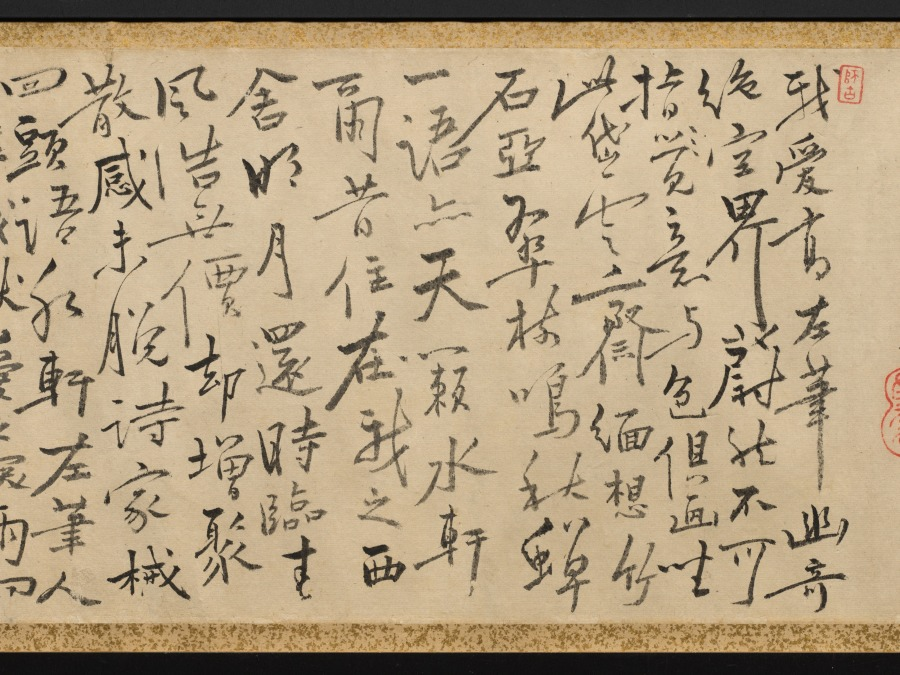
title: Plum Blossoms and Peonies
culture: China, Qing dynasty (1644-1911)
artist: Gao Fenghan (Chinese, 1683–1749)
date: 1741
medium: handscroll, ink on paper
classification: Painting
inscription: Artist's 2 inscriptions and 9 seals (the painting of Peonies with the artist's colophon and the colophon by Hou Chia-fan are on a single sheet of paper). Artist's inscription and 2 seals (Plum Blossoms): [seal] Ts'ai-yün. After finishing writing my colophon, I unrolled the painting to take another look, and it now seems that the composition here should have moved to the later part of the scroll. If that is the case, then the "Cool Beauty" [prunus] of the Solitary Hill is after all unable to take precedence over the "King of Flowers" [peony]. A laugh. Lao-fou inscribed. [seal] Feng-han. Artist's colophon (Plum Blossoms): [3 seals] Tun; Yen-yün-kung-yang, Hou-shang-tso-sheng. A few days after I painted this scroll for Shui- hsien [Yüeh Meng-yüan], the plum blossoms were in full bloom at his residence. He invited me over to enjoy them together for a long while, and I composed two additional poems and wrote them down here for his criticism. [Poems on the colophon are not translated.] First month, twenty-first day, your junior, Kao Feng-han of Nan-fou drafted this with the left hand. [seal] Feng-han. Artist's inscription and 4 seals (Peonies): Brushed with the left hand in the hsin-yu year [1741]. [seal] Yu-hsi. [3 seals at end of painting] Hou-shang-tso-sheng; Yen-yün-kung-yang; Shih-tsao-wu. Artist's colophon and seal (Peonies): The imperial concubine from the Yang family loved to dress in red, And from the emperor won the title of Hai-t'ang. But ever since she became the new dream of the moon palace, She changed into rainbow colors, while learning to dance. After I wrote the poem on Looking for Plum Blossoms in the Teng-wei Mountains, I attached to it a few branches of prunus, some bamboo tips and a piece of rock, with a scattering of green [moss] here and there to fill up the scroll. Unexpectedly, my playful fascination [with these subjects] was still not quite satisfied, so I made up these amorous ideas and romantic images [of the peony], to follow the footsteps of the fair lady of the Ku-hsieh Mountain [prunus]. Furthermore, I picked out one poem to be my vanguard. Perhaps such luminosity of wealth and power will be enough to overwhelm the poor fellows, and [they] will not mind the comparatively short length [of paper] assigned to it. Amusingly inscribed. Please correct me again. To Shui-hsien, my learned senior, your junior Han inscribed again. [seal] Tso-hua [left-handed painting]. 1 additional colophon and 5 additional seals: 1 colophon, dated 1742, and 3 seals of Hou Chia-fan (act. ca. 1742); 1 seal of P'u Ch'üan (20th c.?); 1 seal of Li family (dates unknown).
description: One of the so-called Yangzhou Eccentrics (a group of painters who lived in Yangzhou and were known for their unorthodox art and lifestyle), Gao Fenghan depicts China’s two most loved flowers in full bloom—the “cold beauty,” or plum blossom, in the first section, and the “king of flowers,” or peony, in the second section. Painted in 1741, the year when Gao decided to leave the south and return home to Shandong province in eastern China, this work was likely a token of farewell. His casual brushwork may indicate his mental and physical struggle at the time. After having crippled his right hand in 1737, Gao used his left hand to paint and achieved a crudeness and eccentric style unattainable before.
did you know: In East Asian art, peonies traditionally symbolize prosperity and wealth.